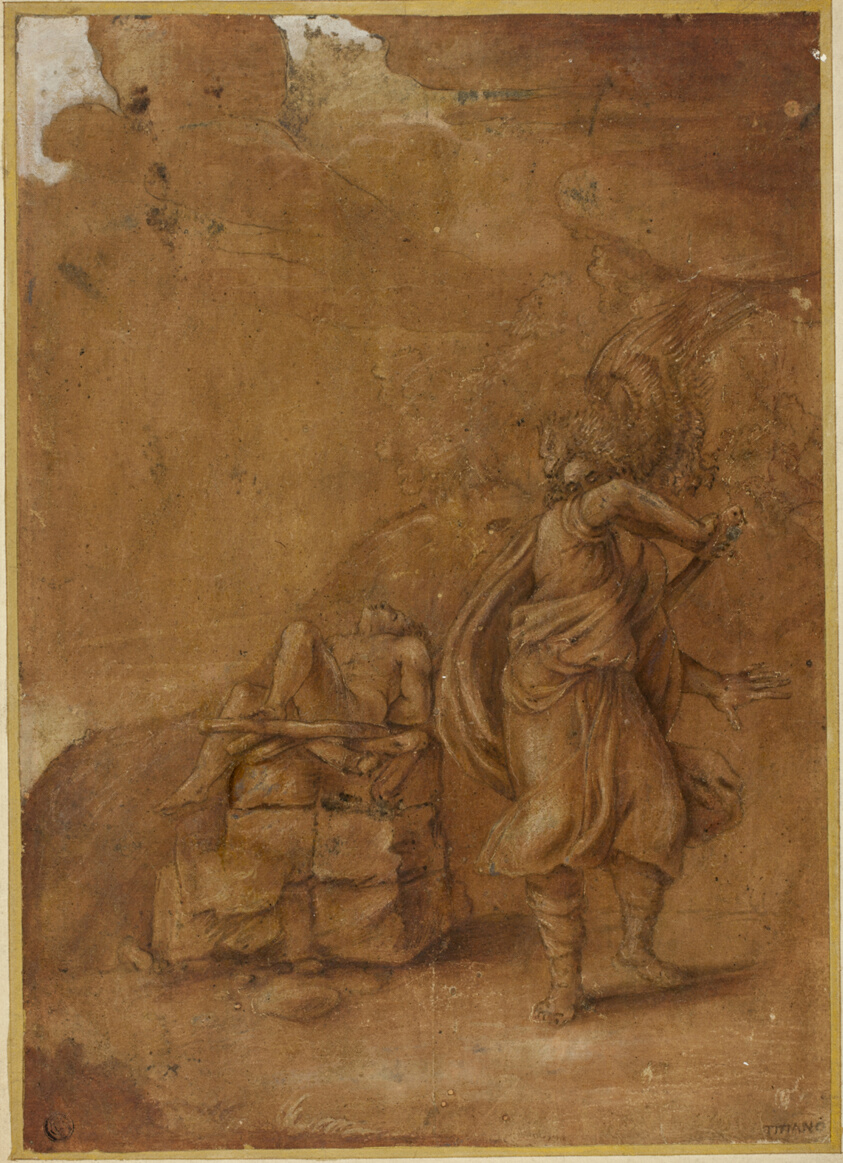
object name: Drawing and Watercolor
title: Sacrifice of Isaac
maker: Follower of Lelio Orsi (Italian, 1508 or 1511–1587); or possibly after Giovanni Antonio da Pordenone (Italian, c. 1484-1539)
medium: Brush and brown ink and wash, heightened with lead white (partly oxidized), covered with shellac, on cream laid paper, laid down on card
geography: Italy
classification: ink and wash; drawings (visual works); prints and drawing